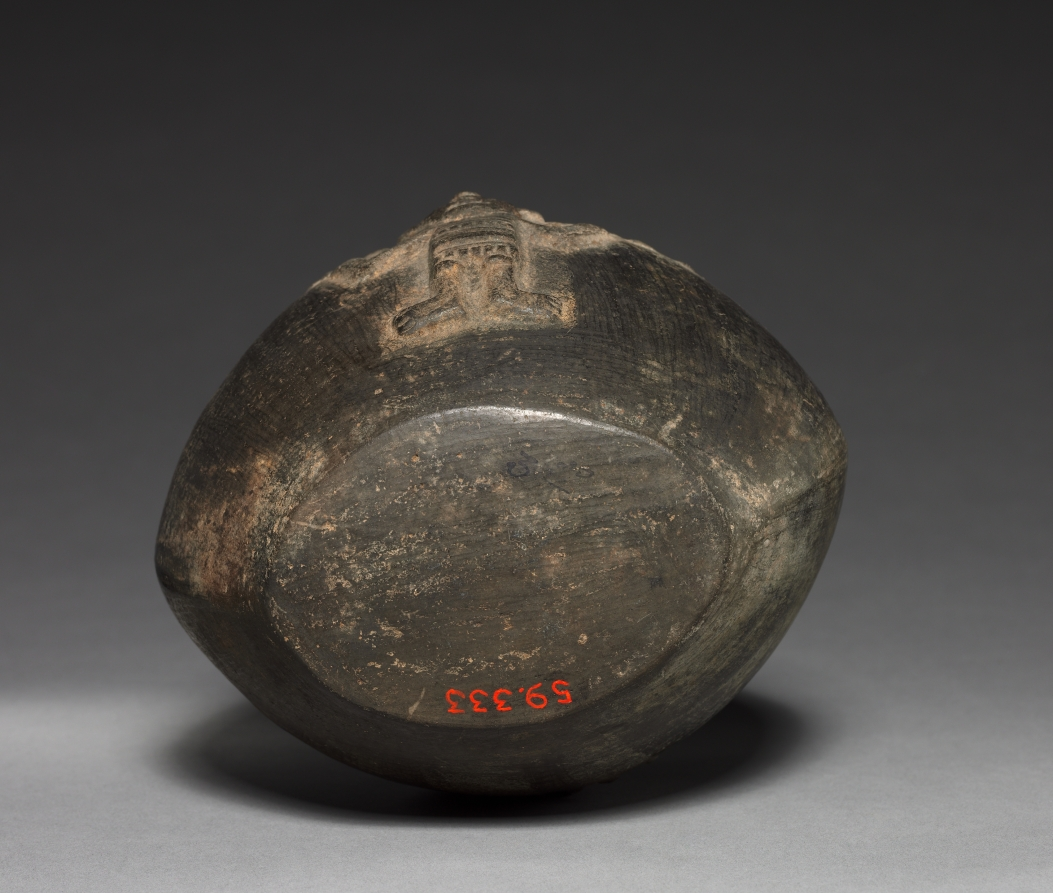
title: Bottle with Figure in Relief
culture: Peru, probably Chiclaya, Chimú, 13th-15th century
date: 1200s-1400s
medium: black ware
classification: Ceramic